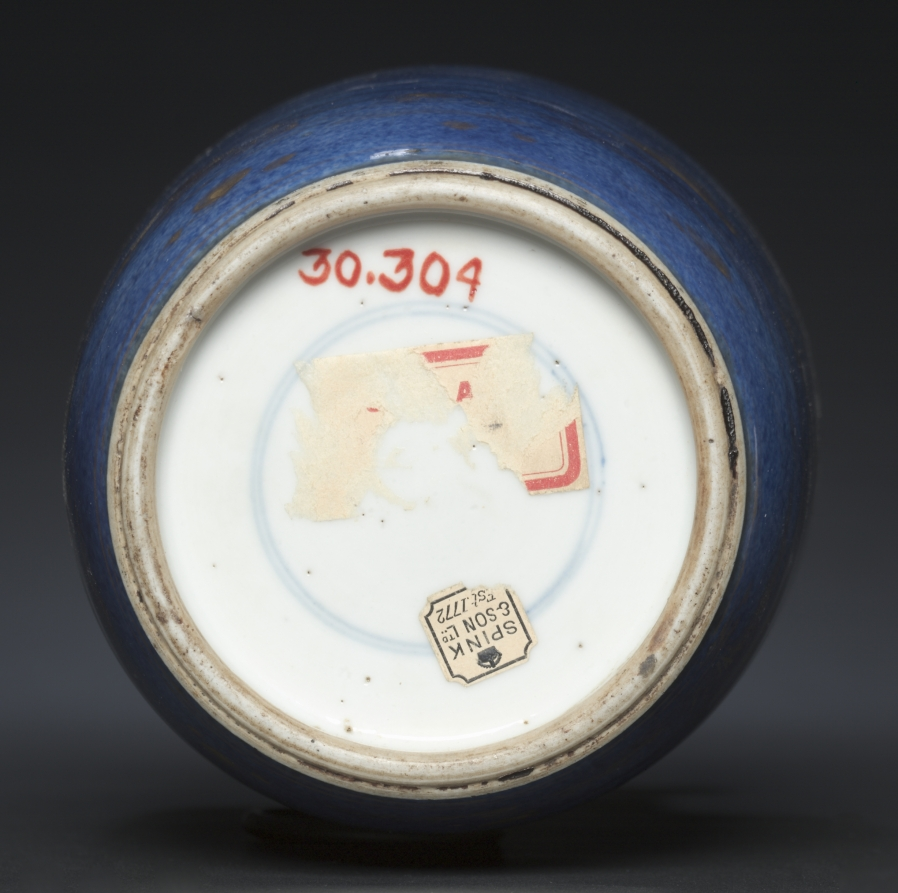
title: Vase with Lotus Plants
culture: China, Qing dynasty (1644-1911), Kangxi reign (1661-1722)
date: 1662–1722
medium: porcelain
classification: Ceramic